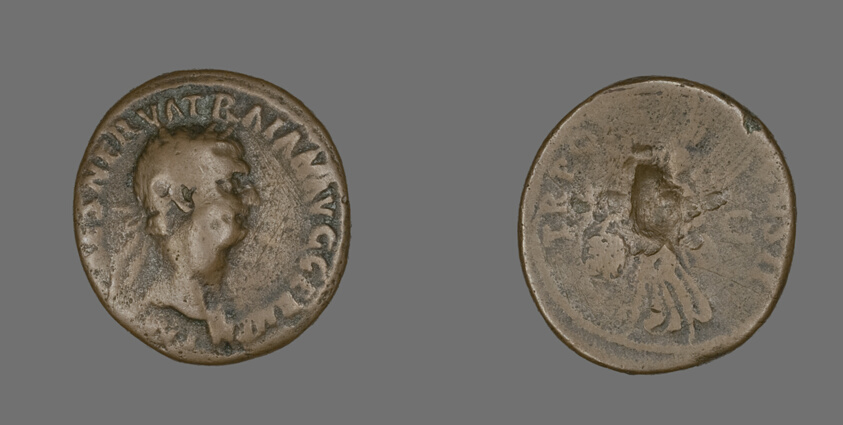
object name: Coin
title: As (Coin) Portraying Emperor Trajan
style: roman (ancient, style or period)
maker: Roman, minted in Rome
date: 98-99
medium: Bronze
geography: Roman Empire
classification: coin; ancient art